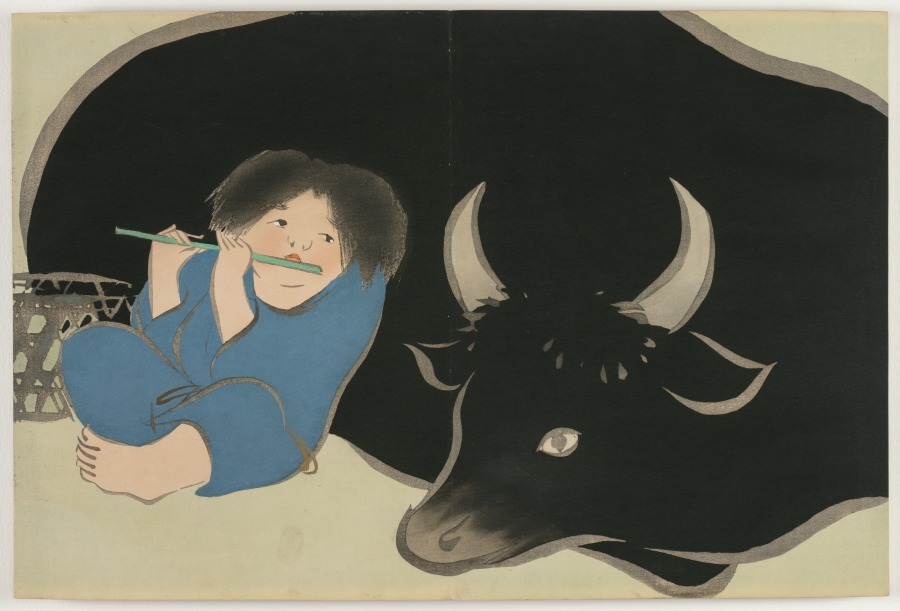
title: Flowers of a Hundred Worlds (Momoyogusa): Oxherd (Bokudo)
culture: Japan, Meiji period (1868–1912)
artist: Kamisaka Sekka (Japanese, 1866–1942)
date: 1909–10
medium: color woodcuts with gold and silver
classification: Bound Volume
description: This print from a set of three woodblock printed albums displays the graphic design prowess of Kamisaka Sekka. The images were first distributed one by one to subscribers to the series but later were reissued in bound form, like this book, for mass consumers. Each print features a vignette taken from nature or Japanese literature. Many of the scenes have a long history in Japan, originating in the 900s or 1000s and having been interpreted by all manner of artists since that time. Sekka’s selections hew closely to precedents from the Rinpa style originated by painter Tawaraya Sōtatsu (c. 1570–c. 1640) and calligrapher Hon’ami Kōetsu (1558–1637).